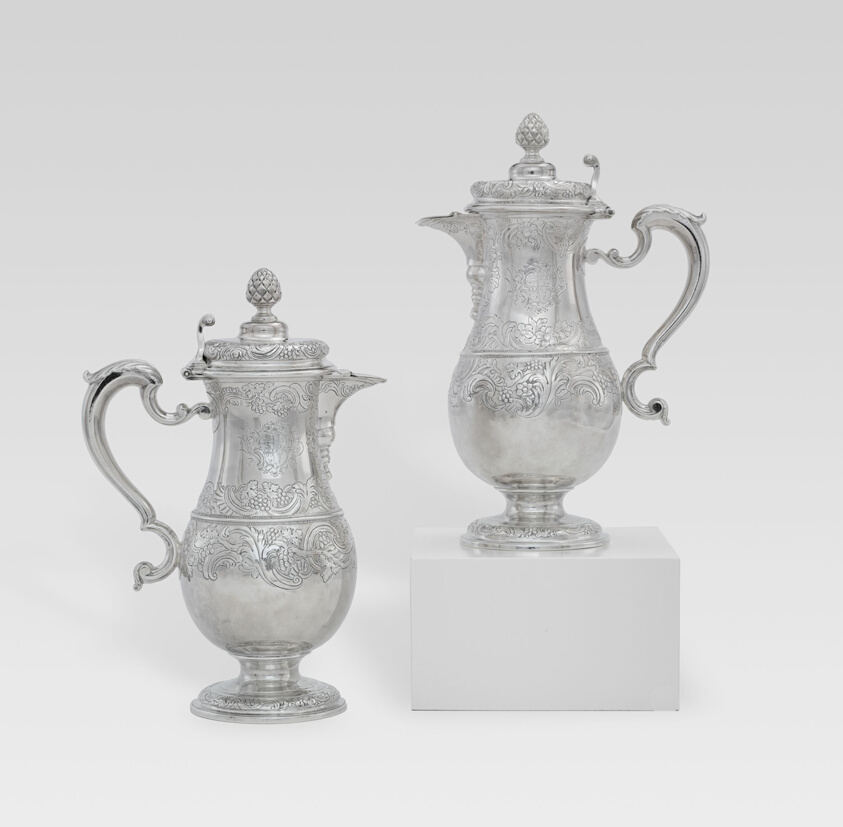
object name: Metalwork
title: Pair of Wine Ewers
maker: David Bomes; Irish, active 1731–c. 1766; Dublin, Ireland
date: c. 1740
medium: Silver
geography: Dublin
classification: ewer (vessel); vessel; silver; metalwork; european decorative arts